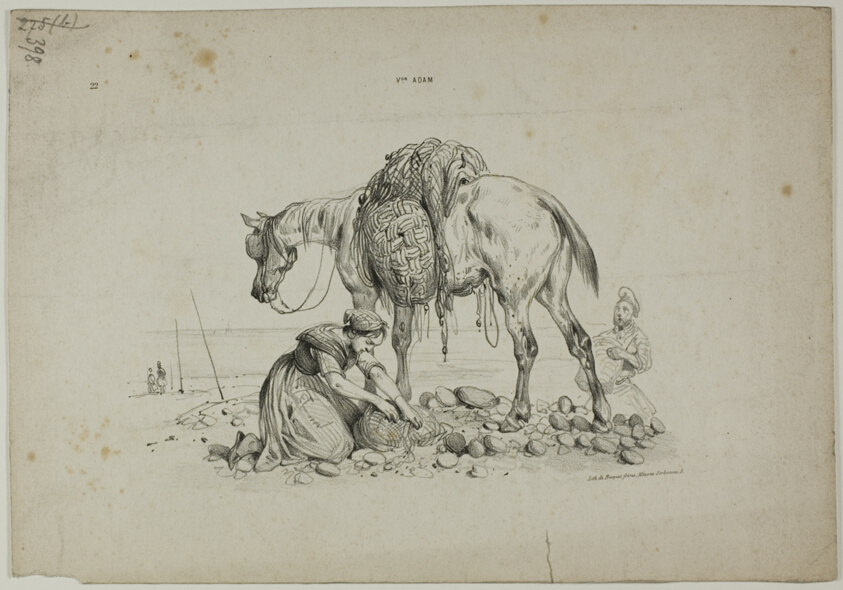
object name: Print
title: Untitled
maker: Victor Adam; French, 1801-1866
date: 1851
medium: Lithograph in black on cream wove paper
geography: France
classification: lithograph; print; prints and drawing